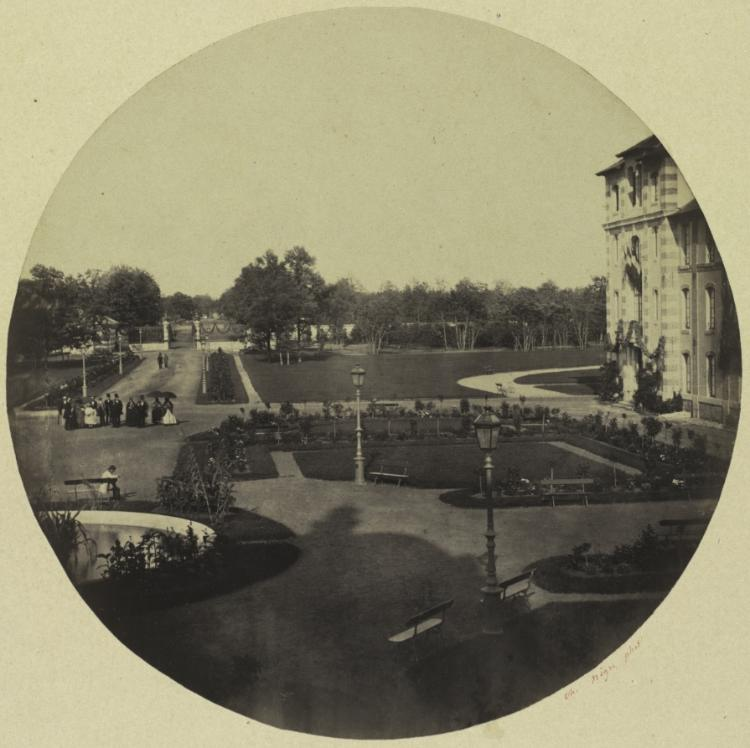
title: The Asylum at Vincennes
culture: France, 19th century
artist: Charles Nègre (French, 1820–1880)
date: c. 1859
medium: albumen print from wet collodion negative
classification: Photograph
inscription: written in pencil on verso: "38 [circled]" written on first mount in red ink: "Ch. Nègre phot"